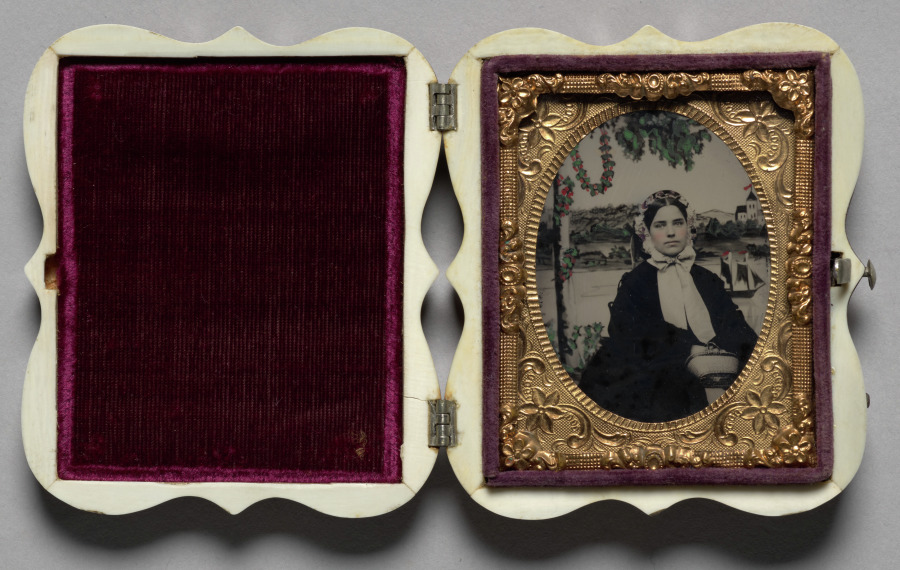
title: Woman with elaborate nautical backdrop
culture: America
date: c. 1860–65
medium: ambrotype, tinted, ninth plate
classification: Photograph